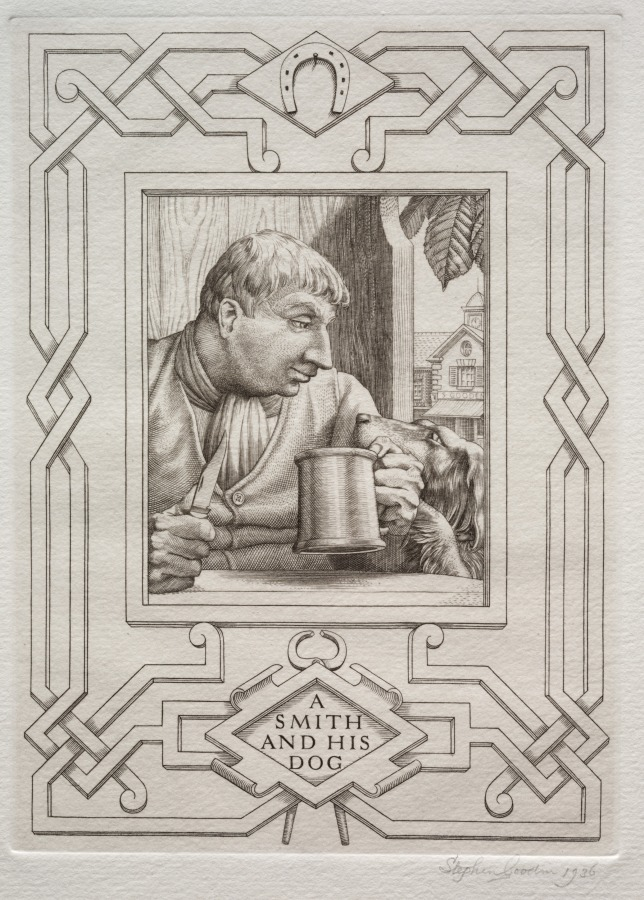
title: Aesop's Fables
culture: England, 20th century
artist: Stephen Gooden (British, 1892–1955)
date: 1936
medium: engraving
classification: Portfolio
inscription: signed in pencil, lower right margin: Stephen Gooden 1935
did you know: Stephen Gooden was also a well-known bookplate designer; one of his designs was for the royal library at Windsor Castle.